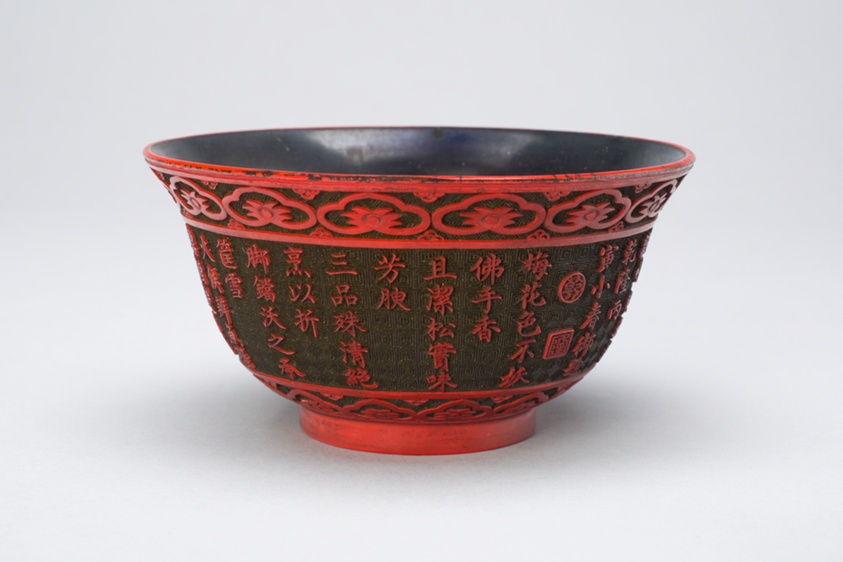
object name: Vessel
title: Lacquer Tea Bowl 乾隆禦制雕漆盞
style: Chinese (culture or style)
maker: China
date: Qing dynasty (1644–1911), Qianlong reign mark and period (1736–1795)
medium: Cinnabar and black lacquer with carved decoration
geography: China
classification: drinking vessel; lacquer; asian art; vessel